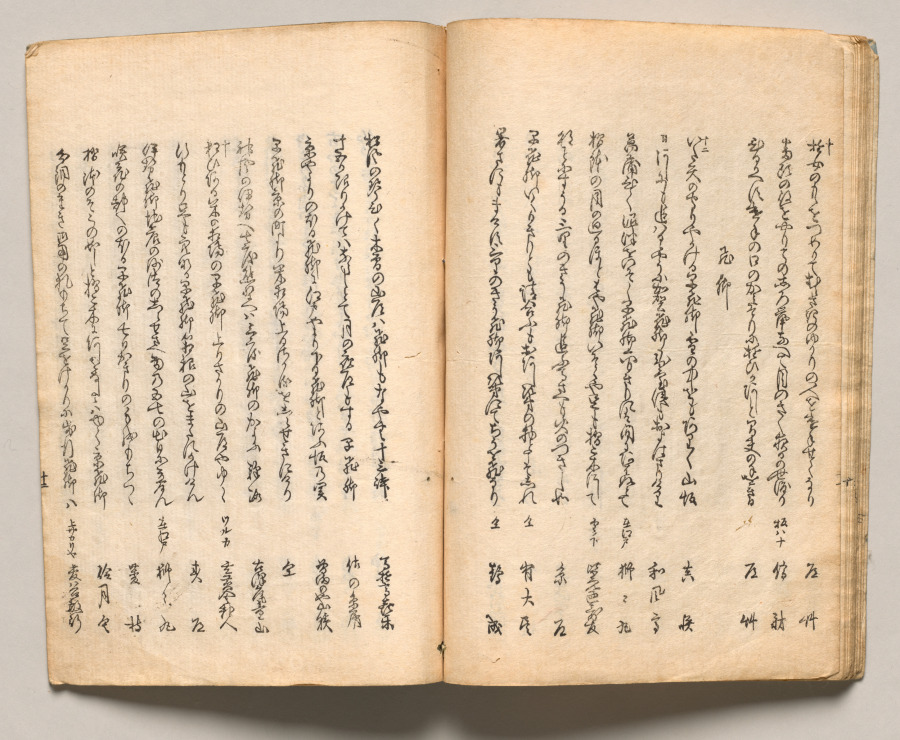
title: Spread Nineteen from Volume Two of People of Japan in Light Verse (Kyōka)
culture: Japan, Edo period (1615–1868)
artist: Utagawa Hiroshige (Japanese, 1797–1858)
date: 1857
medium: Woodblock-printed book; ink and color on paper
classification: Bound Volume